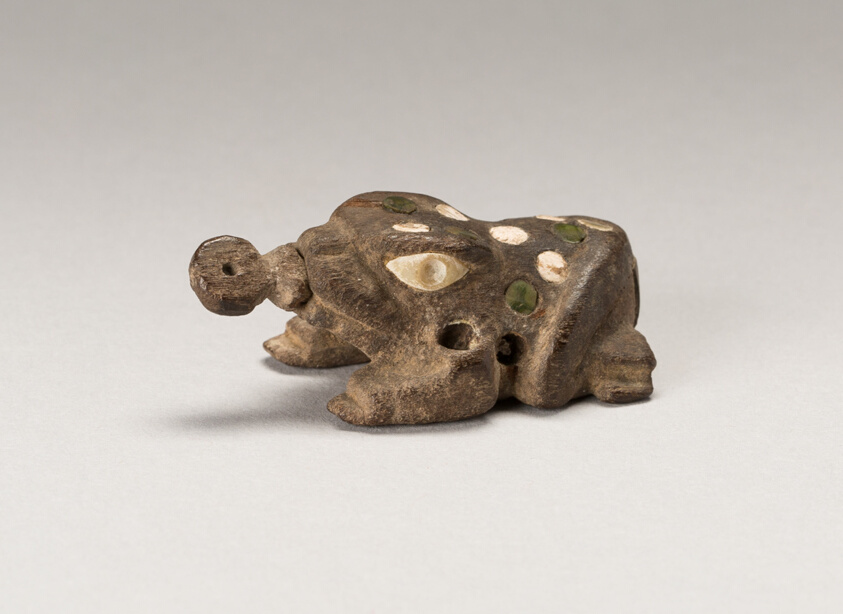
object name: Vessel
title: Container For Lime in the Shape of a Frog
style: moche, Arts of the Americas, andean, andes, south american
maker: Possibly Moche; Possibly North coast, Peru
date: c. 100 BCE–500 CE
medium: Wood with shell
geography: Northern Peru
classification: wood; vessel; art of the americas